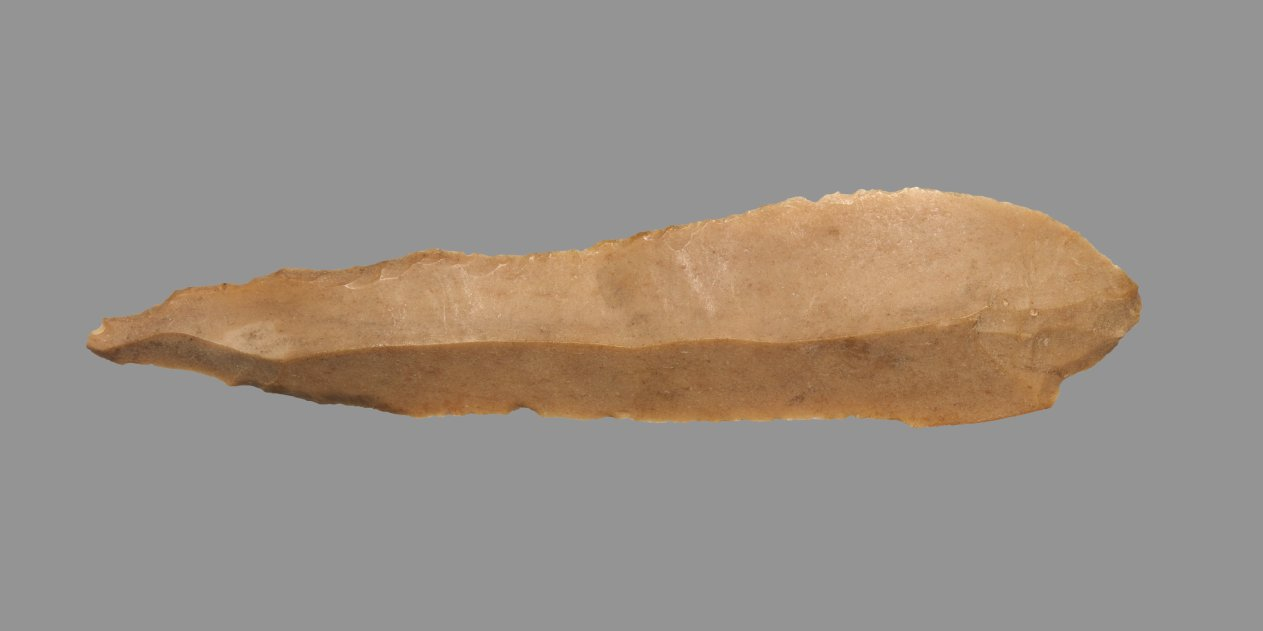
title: Sickle Blade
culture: Egypt, Middle Kingdom (2040–1648 BCE), Dynasty 12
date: 1980–1801 BCE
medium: flint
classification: Implements